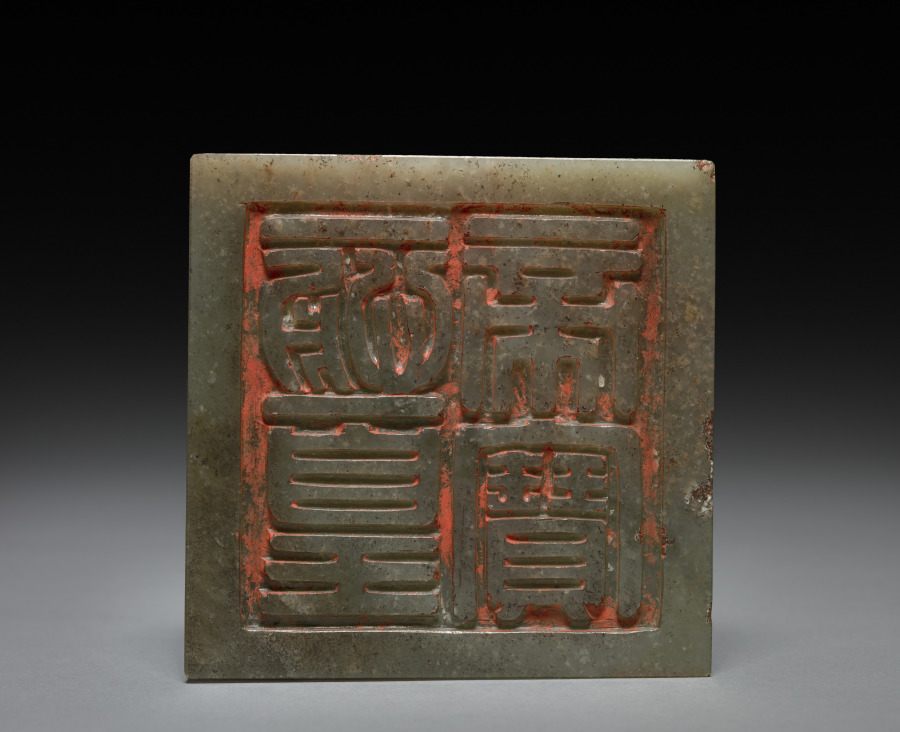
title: Seal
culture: China, Qing dynasty (1644-1911)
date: 1700 or later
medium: Jade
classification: Jade